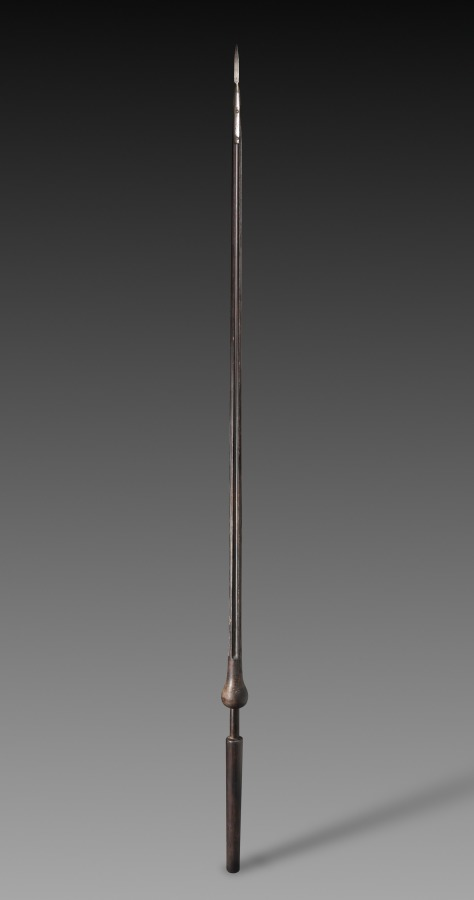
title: Tourney Lance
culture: unassigned (European), probably late 19th century (in 16th century style)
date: probably late 1800s (in 16th century style)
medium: wood, five concave sections, painted red and white; steel point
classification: Arms and Armor